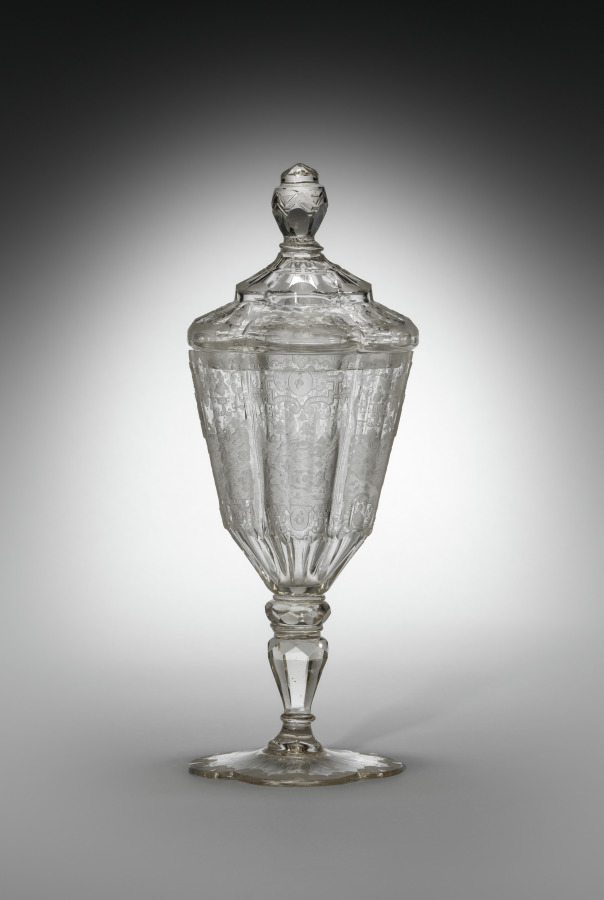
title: Standing Cup with Cover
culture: Germany, Silesia, 18th century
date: c. 1725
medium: glass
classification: Glass